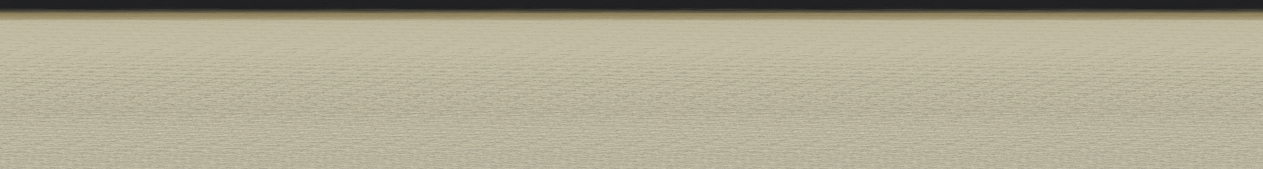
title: Chrysanthemums and Cabbage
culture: China, Ming dynasty (1368–1644)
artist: Tao Cheng (Chinese, active c. 1471–after 1502)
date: c. 1486 or before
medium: handscroll, ink and slight color on paper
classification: Painting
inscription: Artist's seal at beginning of painting: Yun hu 雲湖. Title by Wang Wenzhi 王文治 (1730–1802), date 1756. 2 seals of Wang Wenzhi 王文治 (1730-1802); 3 seals of Ku Yün (n. d.)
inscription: Section A (Chrysanthemums): 1 poem and 1 seal of Zhang Yuanzhen 張元禎 (1437–1507) - Jinshi, 1461; 1 poems and 3 seals of Ni Yue 倪岳 (1444–1501) - Jinshi, 1464; 1 poems and 2 seals of Zhao Xiang 趙祥 (life dates unknown) - Jinshi, 1469; 1 poems and 1 seals of Wu Xixian 吳希賢 (1437–1489) - Jinshi, 1464; 1 poems and 1 seals of Lü Chang 呂㦂 (1449–1511) - Juren, 1471; 1 poems and 3 seals of Fu Han 傅瀚 (1435–1502) - Jinshi, 1464; 1 poems and 1 seals of Feng Jue 馮珏 (life dates unknown) - Jinshi, 1478.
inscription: Chrysanthemums section, poem 1, by Zhang Yuanzhen 張元禎 (1437–1507): Several bushes of chrysanthemums grow in front of the Five-Willow Cottage,/ The yellow ones are really yellow and the white ones white./ This affable and decent fellow, young in years and unsophisticated,/ Has snapped one of the branches to dip in ink. (The Five-Willows Cottage was the home of the poet Tao Qian 陶潛 (Tao Yuanming 陶淵明, AD 365-427).) Chrysanthemums section, poem 2, by Ni Yue 倪岳 (1444–1501): Where at the Eastern Fence can you grieve for the Soul of the Xiang River?/ A man of upright character is mourned within the traces of ink./ White jade with a slight flaw would be a grievance forever,/ Later men should understand why even the roots of the flowers are washed. (Eastern Fence refers again to the poet Tao Qian 陶潛, while the Soul of the Hsiang River refers to the poet Qu Yuan 屈原 (c. 340–278 BC).) Chrysanthemums section, poem 3, by Zhao Xiang 趙祥 (life dates unknown): A clump of chrysanthemum grows in front of the bamboo pavilion,/ The winds of many autumns have blown since we parted beyond the river./ Straining wine through the official's cap of Tao [Qian] to prolong autumn's pleasures,/ The mists and clouds of ten thousand miles belong to the intoxicated. Chrysanthemums section, poem 4, by Wu Xixian 吳希賢 (1437–1489): It is a different spring if mulberry is planted during the latter part of the year,/ The dust of the world originally did not drop on clothing./ Who spills out ink under the Eastern Fence/ And paints so freely this portrait of chrysanthemums for the venerable Sir Tao? Chrysanthemums section, poem 5, by Lü Chang 呂㦂 (1449–1511): This full tray of ink for painting [flowers] at the Eastern Fence;/ Their whiteness or yellowness is not essential in capturing their beauty./ I don't have to go to Jiangnan to see them myself./ At my old house grow two or three branches. Chrysanthemums section, poem 6, by Fu Han 傅瀚 (1435–1502): Who daubed autumn flowers with ink/ As if they were dark dew on a branch tip only vaguely seen at evening?/ After the lazy clouds disperse, no one paints;/ A certain unconventionality pervades this painting. Chrysanthemums section, poem 7, by Feng Jue 馮珏 (life dates unknown): To satisfy his hunger, [the chrysanthemums] have at times entered the poetry of Qu Yuan;/ Taking up the wine cup, it felt close to Tao Qian./ [With them I am like] a lonely root sustained by deep water/ Or an old man to whose hair the color of youth returns.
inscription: Section B (Cabbage): 1 poem and 1 seal of Cai Qi 蔡圻 (life dates unknown) - degree information not known; 1 poems and 3 seals of Ni Yue 倪岳 (1444–1501) - Jinshi, 1464; 1 poem and 3 seals of Jiao Fang 焦芳 (1436–1517) - Jinshi, 1464; 1 poem and 3 seals of Li Dongyang 李東陽 (1447–1516) - Jinshi, 1464; 1 poems and 1 seals of Wu Xixian, signed “Xixian” 吳希賢 - Jinshi, 1464; 1 poems and 3 seals of Fu Han 傅瀚 (1435–1502) - Jinshi, 1464; 1 poems and 1 seals of Lü Chang 呂㦂 (1449–1511) - Juren, 1471; 1 poems and 2 seals of Zhao Xiang 趙祥 (life dates unknown) - Jinshi, 1469; 1 poems and 1 seals of Feng Jue 馮珏 (life dates unknown) - Jinshi, 1478.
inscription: Cabbage section, poem 1, by Cai Qi 蔡圻 (life dates unknown): The ink splashes are fresh from a frosty brush dipped in pond water;/ I can visualize that time when Yunhu 雲湖 [Tao Cheng] first showed his talents./ I lament the places where I scribbled before,/ Who would open them to inscribe a poem? (The first line is an allusion to the famous Jin dynasty calligrapher Wang Xizhi 王羲之 (AD 303-361), who practiced calligraphy so diligently at the edge of a pond that the water turned black with ink.) Cabbage section, poem 2, by Ni Yue 倪岳 (1444–1501): After rain the vegetables begin to grow;/ How are the colors of the masses lately!/ Once you get used to them, the tastiest parts are the ends of the roots;/ I don't know if they can be used for "seasoning soup." ("Seasoning soup" is an allusion to the statesmanship of a chief minister.) Cabbage section, poem 3, by Jiao Fang 焦芳 (1436–1517): This crop of purple stalks and green leaves is late and irregular;/ Now the rainy season is over for the Eastern Garden./ All the nobles nowadays dine on meat;/ Who of them knows the flavor of this [cabbage]. Cabbage section, poem 4, by Li Dongyang 李東陽 (1447–1516): It's always helped the honest man to sober up after drinks./ I intend to go to the deepest part of the stream-crossed garden/ To refresh myself in the fragrance and dew of evening. Cabbage section, poem 5, by Wu Xixian 吳希賢 (1437–1489): After rain, the white silk is filled with fragrant vegetables;/ How many times this happens in Mr. Tao's paintings./ On whom will you depend to present a memorial to the ruler?/ Don't let this color emerge on the faces of the people. (The last line is meant as a warning to officials: the color of the vegetables (green) may be pleasing in itself, but when it emerges on the faces of the starving poor, it signifies a badly governed world.) Cabbage section, poem 6, by Fu Han 傅瀚 (1435–1502): For twenty years I have feasted on the excellent mutton of an official;/ Yet I talk and dream about the garden and its vegetables./ Do not merely say it is good to chew the root of the cabbage--/ You must taste to understand what poverty is. Cabbage section, poem 7, by Lu Chang 呂㦂 (1449–1511): The capital is never a place for an apprentice in the "garden of scholarship."/ Who would write about gardens and vegetables on an examination paper?/ I've walked throughout the country in spring;/ Make sure the people don't show this color. Cabbage section, poem 8, by Zhao Xiang 趙祥 (life dates unknown): After a wash of rain, the spring garden is still in order;/ The flavor [of the cabbage] is more suitable with a small drink and the hum of a tune./ The rich and powerful in their mansions consume dish after dish of meat;/ Vegetarian food is known only by the scholars. Cabbage section, poem 9, by Feng Jue 馮珏 (life dates unknown): A new cabbage is nourished with dew;/ It takes a long time to grow and mature./ The business of "seasoning the soup" is your responsibility;/ Better command the gardener to take care [of the cabbages]. trans. HK/LYSL/WKH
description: On an autumn day in Beijing, Tao Cheng had a gathering with a group of scholar-officials and created two paintings in a spontaneous, casual style. The first depicts chrysanthemums, slender bamboo stalks, and a rock in monochrome ink. Tao applied light colors for the second painting that depicts cabbage. Tao deliberately placed the images on the first sections of the paper so that his honorable guests could add their poetic inscriptions inspired by his imagery. In the first section to the right, all seven poetic inscriptions refer to the beloved poet and recluse Tao Qian (also called Tao Yuanming, AD 365–427) who was particularly known for his profound love for chrysanthemum flowers. Most of the inscriptions in the second section express sympathy for the poor, since cabbage is the main ingredient in their humble food. Taken together, the poems and paintings allude to the life and responsibilities of the scholar-official: the importance of both an upright character and a concern for the poor citizens in order to achieve good government.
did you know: Eminent calligrapher Wang Wenzhi 王文治 was only 27 sui when he wrote the title in 1756.